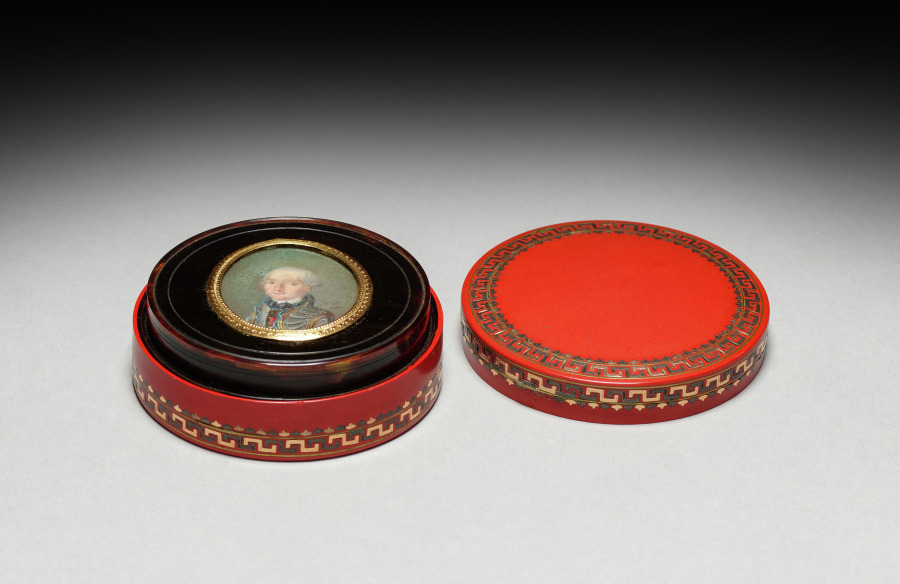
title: Round Box with Lid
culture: France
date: c. 1760–70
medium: tortoiseshell decorated in red lacquer with inlays of gold, silver, and brass wire; contains a portrait miniature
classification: Miscellaneous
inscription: miniature inscribed: annee [?]/1767.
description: This small lacquer box, made in France during the 1700s, references China in that it imitates Chinese material and craftmanship such as red lacquer and celadon. This round box with an inlaid key pattern (an interlocking geometric motif ), emulates the bright vermilion color of Chinese red lacquer, typical of Suzhou lacquer ware. The key pattern is reminiscent of the so-called Chinese thunder pattern (leiwen).